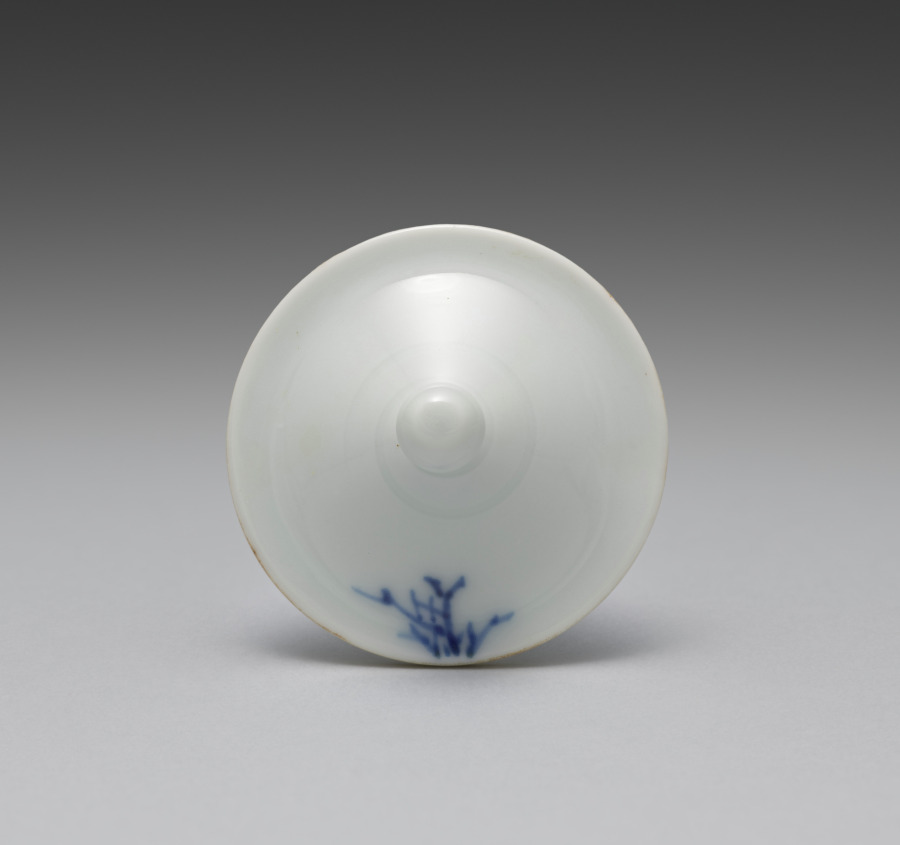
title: Lid for a Teapot from Tea Set with Chinese Landscape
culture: Japan, Meiji period (1868–1912)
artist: Seifū Yohei III (Japanese, 1851–1914)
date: 1893–1914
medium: Porcelain with underglaze blue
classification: Ceramic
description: This tea set with idyllic lakeside Chinese landscapes has a side-handled pot called a kyūsu, used for steeping, straining, and serving tea. Unlike some others, this set also has a yuzamashi, a container used to cool boiled water to just the right temperature for the best flavor when steeping. Seifū Yohei III’s painting teacher, Tanomura Chokunyū (1814–1907), made a visual record of famous sencha events that shows how these kinds of porcelains fit with objects such as a stove and kettle to form a complete set of utensils for tea preparation, and with ensembles of decorative objects meant to inspire creativity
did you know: The teapot depicts two friends playing a board game on a promontory beyond a two-storied residence, while another figure comes across the entry bridge bearing bags of provisions, hung from the ends of a pole balanced across his shoulders.